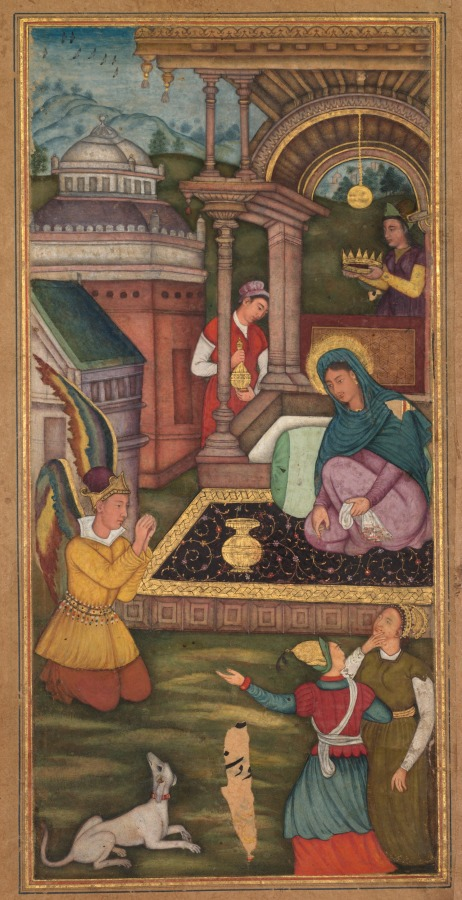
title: The Annunciation (folio 15 recto), from a Mirror of Holiness (Mir’at al-quds) of Father Jerome Xavier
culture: Mughal India, Allahabad, made for Prince Salim (1569–1627)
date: 1602–4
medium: Gum tempera, ink, and gold on paper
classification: Manuscript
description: Mary gazes down at the angel Gabriel as he kneels reverently, like a humble messenger, delivering the news that Mary will give birth to the son of God. His multicolored wings are forced within the boundary line of the painting field, visually implying a sense of subordination. Unlike many of the paintings in the Mirror of Holiness, the Annunciation is a familiar subject in European art, but the emphases vary. The Indian version depicts her as a queen, with a crown held above her head and attendants standing by.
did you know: The text states that Mary was only age 13 1/2 when the angel Gabriel came to her.